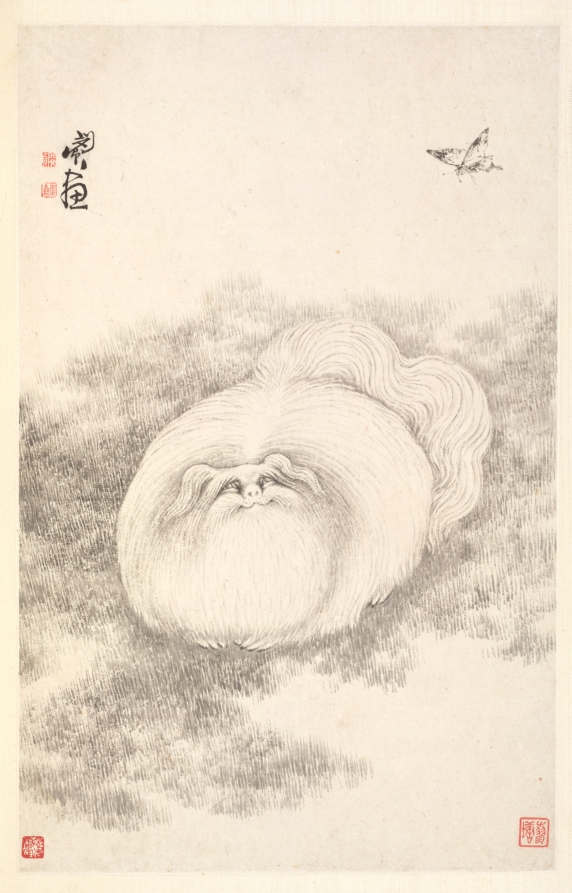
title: Cat and Butterfly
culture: China, Qing dynasty (1644-1911)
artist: Min Zhen (Chinese, 1730–after 1788)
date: 1788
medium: album leaf, ink on paper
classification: Painting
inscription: Six seals appearing on the leaves: Min Zhen 閔貞; Zheng zhai 正齋; Qingqiao 青橋; Zhen 貞; Liao tang 蓼塘; Min Zhen zhi yin 閔貞之印。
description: Min Zhen, who was orphaned at age 12 and developed an eccentric personality, was trained by Tang Yin (1682–1756), a writer, playwright, and superintendent of the imperial porcelain workshops in Jingdezhen. The connection to him may have enabled Min to stay in Beijing for a decade from around 1773. It is not clear whether he ever resided in Yangzhou, but his style is in many instances reminiscent of that of Yangzhou artist Huang Shen. The album was painted for his friend Dailili Shanren in exchange for a scholar’s stone. The paintings demonstrate the artist’s versatility and mature style in the last years of his life. While two leaves are rendered in unconventional compositions seen from above (Cat and Butterfly CMA 1985.71.5) and below (Banana Plant CMA 1985.71.11), they have a humorous touch. “Cat and butterfly” is a homophone for the Chinese characters “mao die,” meaning “octogenarian,” and express the wish for the recipient’s longevity. The banana plant stands for the world of literati but can also allude to Buddhism.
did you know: Cat and butterfly are homophones for the characters “mao die” 耄耋 (octogenarian), so this painting expresses hope that the artist's friend will live a long life.